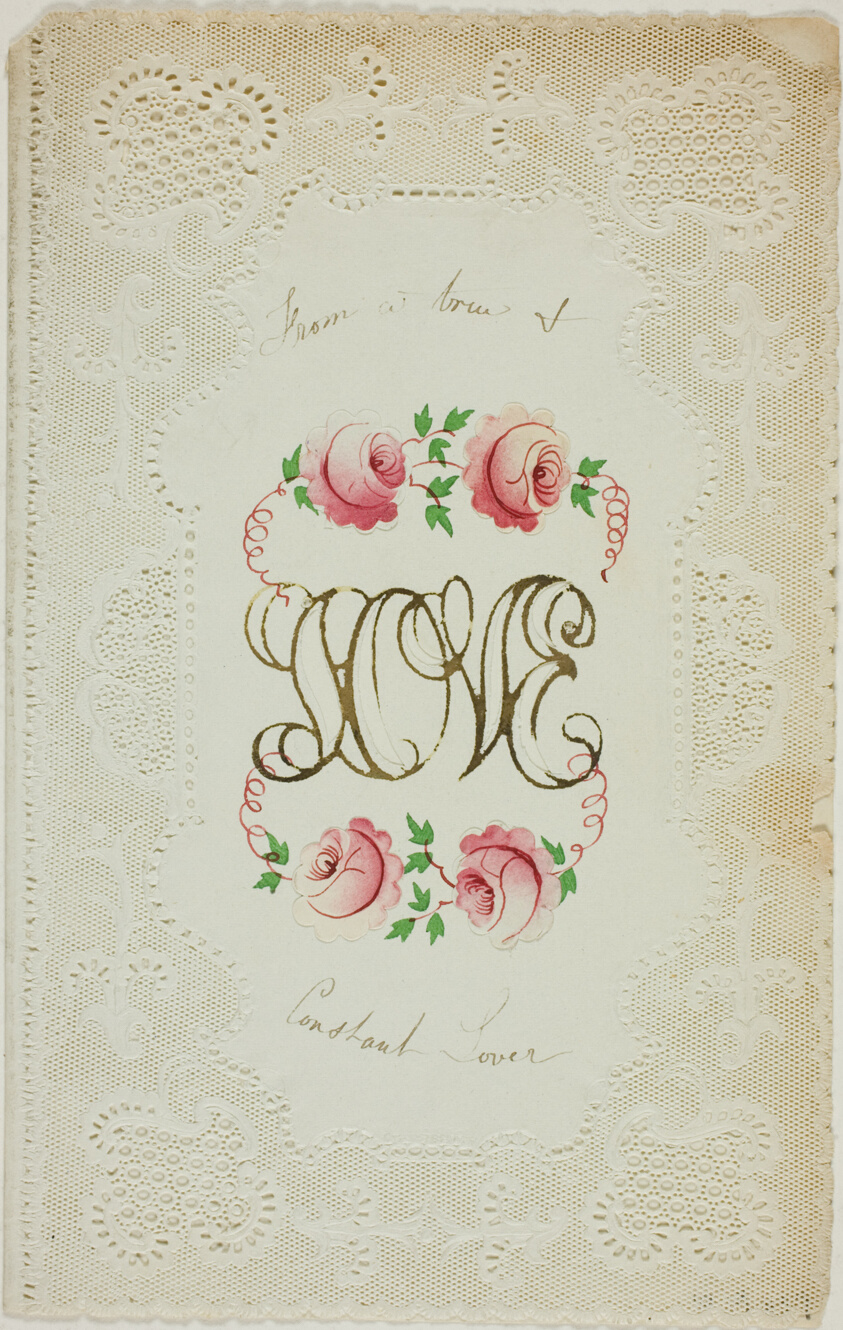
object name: Drawing and Watercolor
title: Love (Valentine)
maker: George Kershaw (English, 19th century)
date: c. 1850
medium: Collaged elements and watercolor, with pen and brown ink on cut and embossed ivory wove paper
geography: England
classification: valentine; prints and drawing; paper